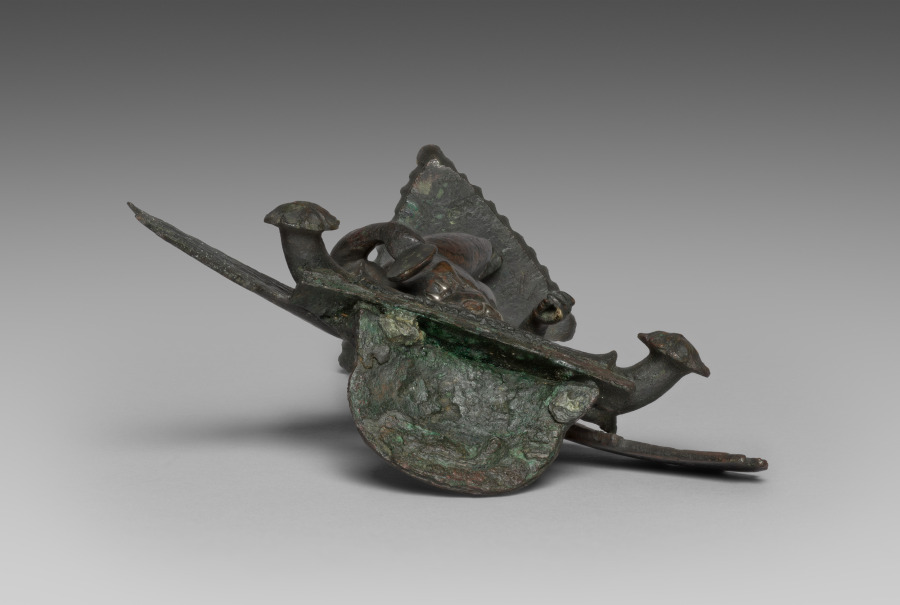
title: Patera Support: Lasa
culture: Etruscan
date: 300–175 BCE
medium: bronze with silver inlays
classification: Sculpture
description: Standing on a triangular base, this winged female figure twists her body while admiring herself in the small mirror held in her left hand. Nearly nude, she wears sandals as well as a leopard or panther skin and jewelry inlaid with silver. Above her head and wings, a small portion of a patera, or shallow offering dish, survives. Inscriptions identify similar winged female figures elsewhere in Etruscan art as Lasas, often together with Turan (an Etruscan goddess analogous to the Greek Aphrodite).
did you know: This elaborate figure served as a handle or support for a patera, a shallow dish.